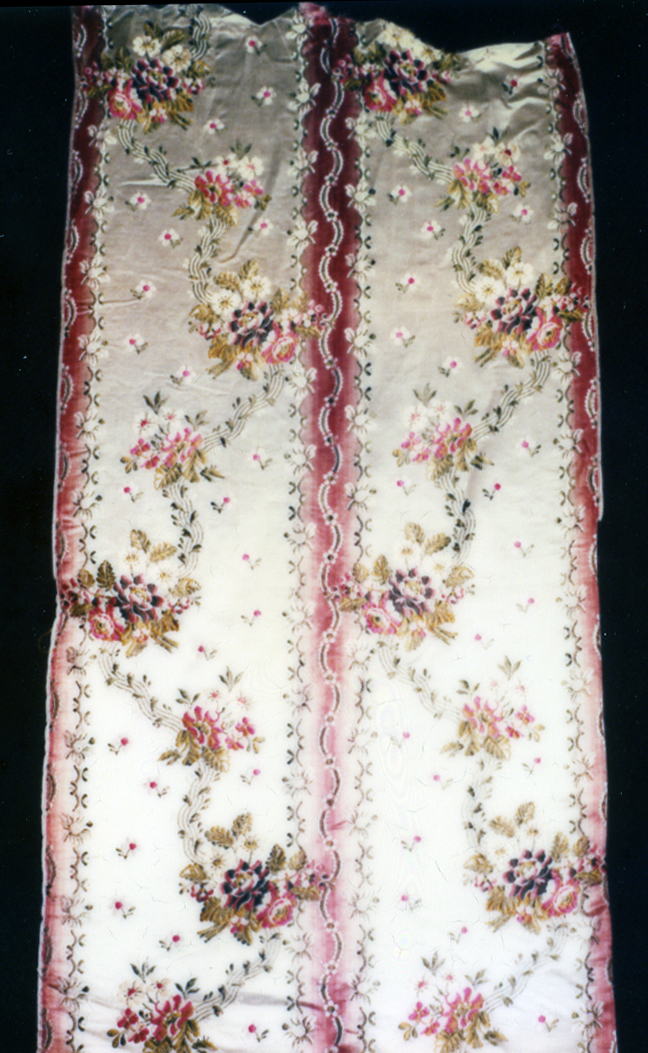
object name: Textile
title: Panel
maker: England, possibly Spitalfields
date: 1725/75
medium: Silk, satin weave with supplementary brocading wefts and self-patterning ground weft floats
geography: England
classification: textile; weaving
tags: flowers, foliage